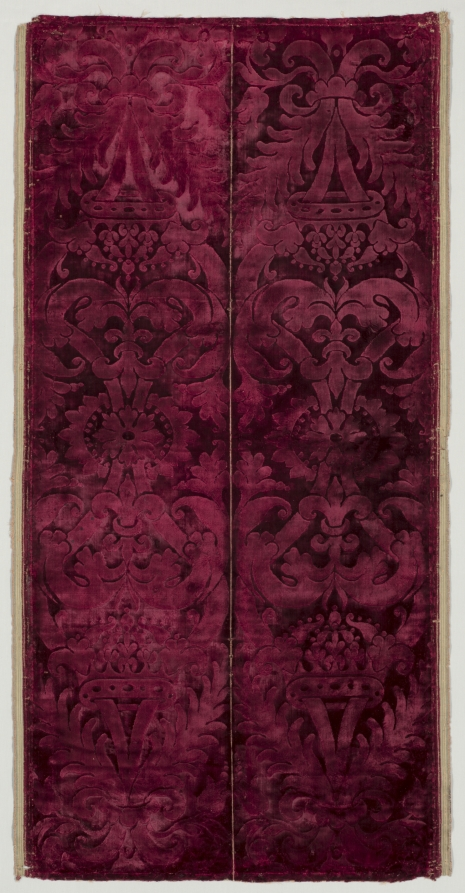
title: Procurator’s Velvet Stole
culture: Italy, Venice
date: c. 1575–1600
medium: Alto e basso silk velvet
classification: Velvet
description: Venetian law obliged senators to wear colored textiles, in contrast to other male citizens, who wore black. The Procurator, a very high level government official, was required to wear a red stole, a cloth worn over one shoulder. So that it would read the same from front and back, the pattern reverses halfway, done by the weaver’s assistant on a drawloom. The line down the center is part of the original manufacture, enabling two stoles to be cut apart for use. The survival of an entire, uncut loom width is extremely rare. The velvet has two different heights of cut pile. The longer pile, which appears lighter, forms the pattern.